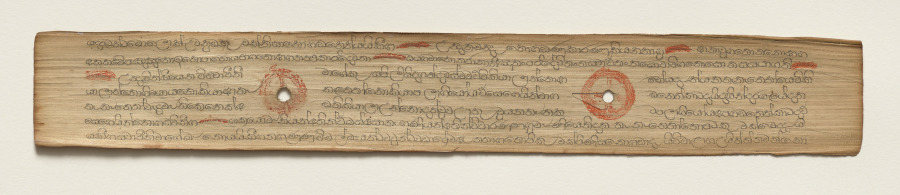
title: Leaf from a Buddhist Manuscript (verso)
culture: Sri Lanka, Singhalese, Late 17th century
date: c. 1700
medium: fiber paper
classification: Manuscript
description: Palm leaf material is still used for manuscripts in Sri Lanka. The palm leaves are prepared first by boiling them, drying them in the sun, and then rubbing them with oils. Scribes then use a metal stylus to incise the text. Then charcoal powder is wiped across the pages, filling in only the inscribed lines.